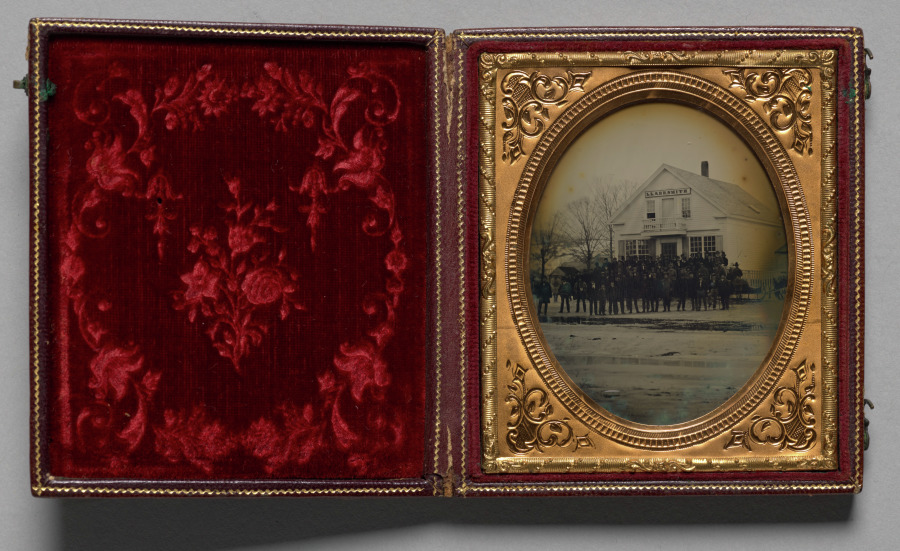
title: Crowd with sleigh in front of LL & ER Smith store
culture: America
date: c. 1858–65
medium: ambrotype, sixth plate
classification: Photograph